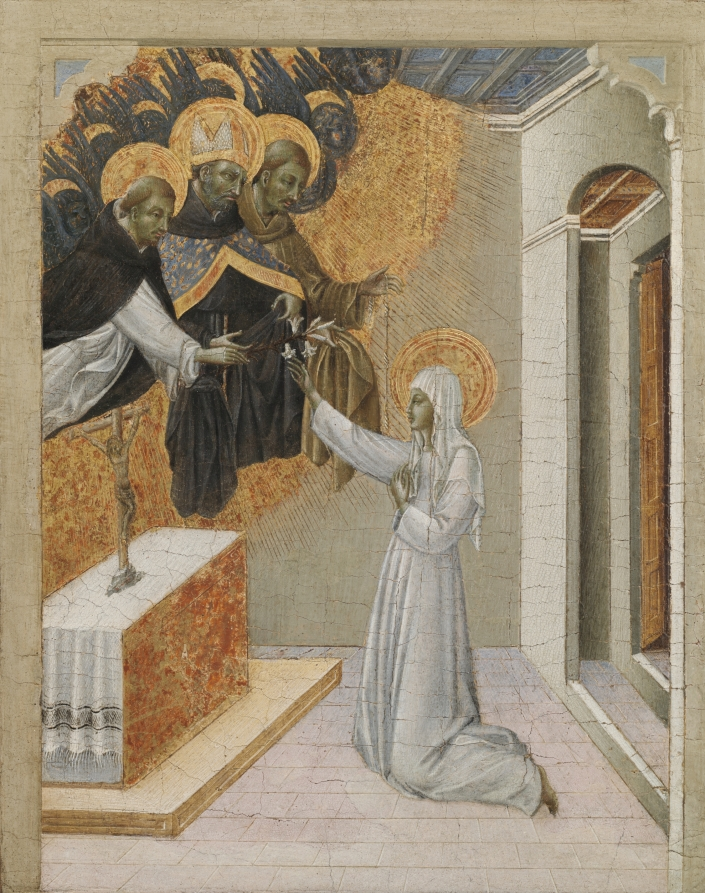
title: Predella Panel from an Altarpiece: St. Catherine of Siena Invested with the Dominican Habit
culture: Italy, Siena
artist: Giovanni di Paolo (Italian, c. 1403–1482)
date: 1460s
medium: tempera and gold on wood panel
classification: Painting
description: Saint Catherine (1347–1380) was the daughter of a prosperous Sienese cloth dyer. At the age of six, she saw a vision of Christ and thereafter dedicated herself to chastity, penance, and good works. She became extremely popular in Siena when she selflessly cared for the sick and dying victims of the bubonic plague, known as the Black Death. These panels were once part of a predella (or pedestal) of a large altarpiece painted for the Hospital Church of Siena. The main scene of this altarpiece, showing the Presentation of Christ in the Temple (now preserved in Siena) was ordered by the Pork Butchers Guild (the Pizzicaiuoli) in 1447. The predella was added later when Catherine was canonized in 1461. In the first panel she kneels before an altar and reaches up to choose from the monastic garments offered by Saints Dominic, Augustine, and Francis, all founders of religious orders. Catherine takes the habit of Saint Dominic, which she wore as the founder of the Sisters of Penance. The second panel shows, at the right, Saint Catherine giving her cloak to a threadbare beggar. The beggar was really Christ in disguise, and at the left he returns the cloak to her. For this act of charity, the cloak perpetually protected its wearer from the cold.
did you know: Saint Dominic can be identified by his black and white habit and the lilies he holds.